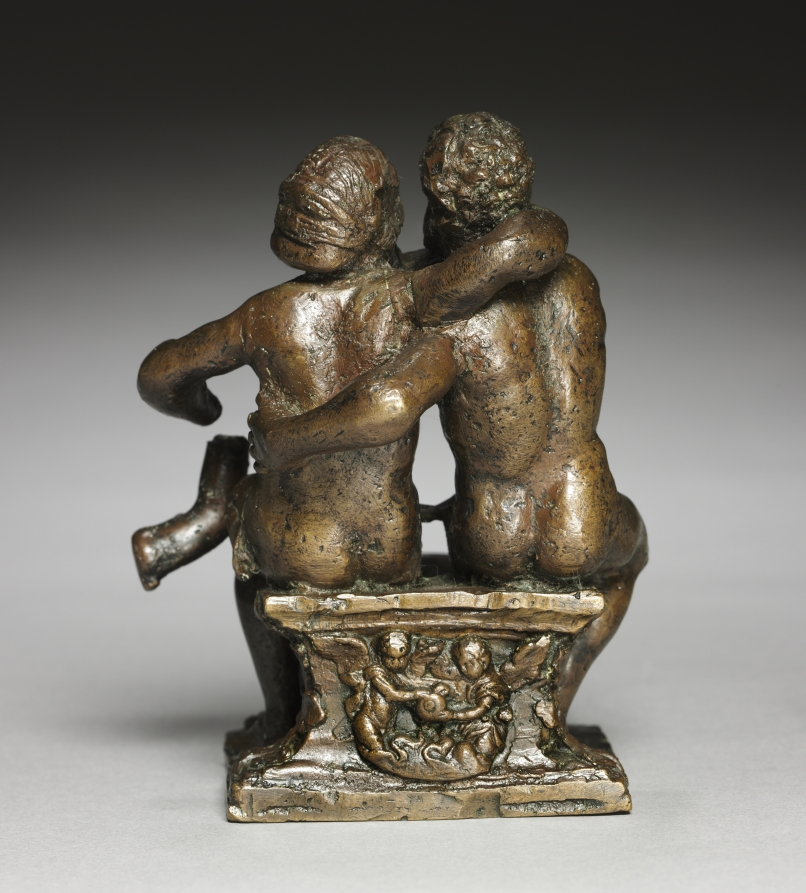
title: Adam and Eve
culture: Germany, Nuremberg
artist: workshop of Peter Vischer (German, 1487–1528)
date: c. 1520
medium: bronze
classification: Sculpture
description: The figures of Adam and Eve embrace on a bench. Together, the figures straddle an upright cornucopia that is meant to serve as an inkwell. The drapery strewn across the figures' laps—and thus covering their genitals—suggests that the scene takes place after the Fall. One can see a remnant of the Tree of Life to the right of Eve. Numerous bronze inkwells of the period survive, though they usually feature a single figure, usually allegorical, and not such an elaborate composition as seen here. This inkwell was formerly in the collection of the Duke of Arenberg, a noble house of the Habsburg Netherlands. The Vischers (Hermann I, Peter the elder, Hermann II, Peter the younger, Hans, Jakob, Paulus, and Georg) were the most renowned bronze casters of Renaissance Nuremberg, and had drawn patrons from across Europe. Because of certain ambiguities in its style, in the past the inkwell had been attributed to Georg Vischer. Stylistically, it resembles some of the miniature figures in Peter Vischer the younger's Shrine of St. Sebald (Church of St. Sebald, Nuremberg), portions of which had been cast at approximately the same time. South German bronze foundries in the sixteenth century would often adapt stylistic elements of Venetian bronzes to suit local tastes, and this inkwell is a product of this phenomenon.